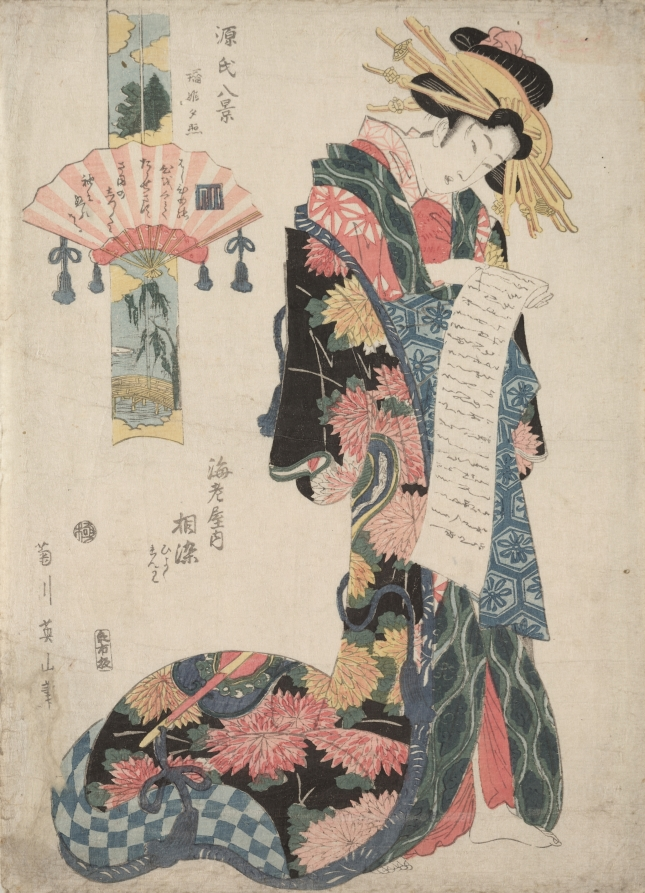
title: The Courtesan Aizome of the Ebiya (From the series Eight Views of the Tale of Genji)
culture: Japan, Edo period (1615–1868)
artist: Kikukawa Eizan (Japanese, 1787–1867)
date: c. late 1800s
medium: color woodblock print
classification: Print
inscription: Signature: Kikugawa Eizan hitsu